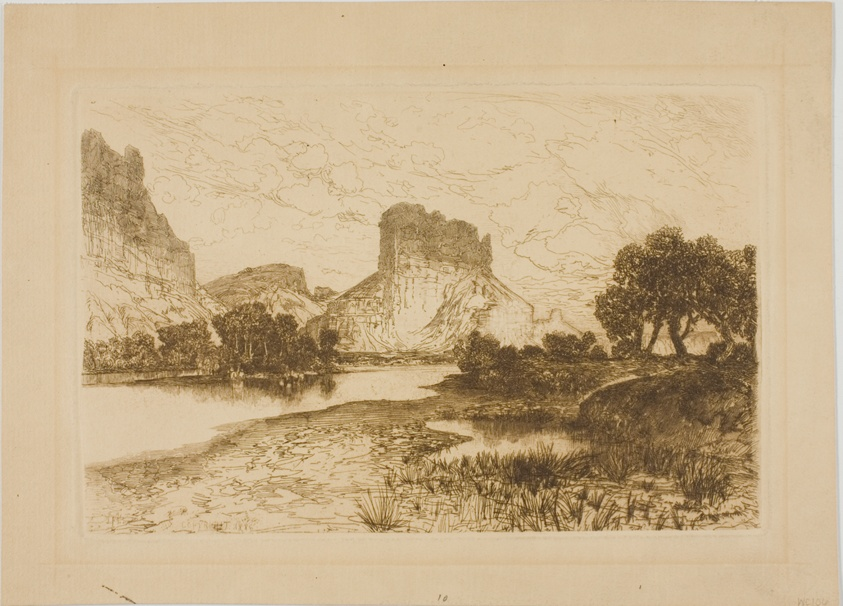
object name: Print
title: Green River, Wyoming Territory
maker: Thomas Moran (American, born England, 1837-1926)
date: 1886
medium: Etching on tan wove paper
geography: United States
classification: etching; print; prints and drawing